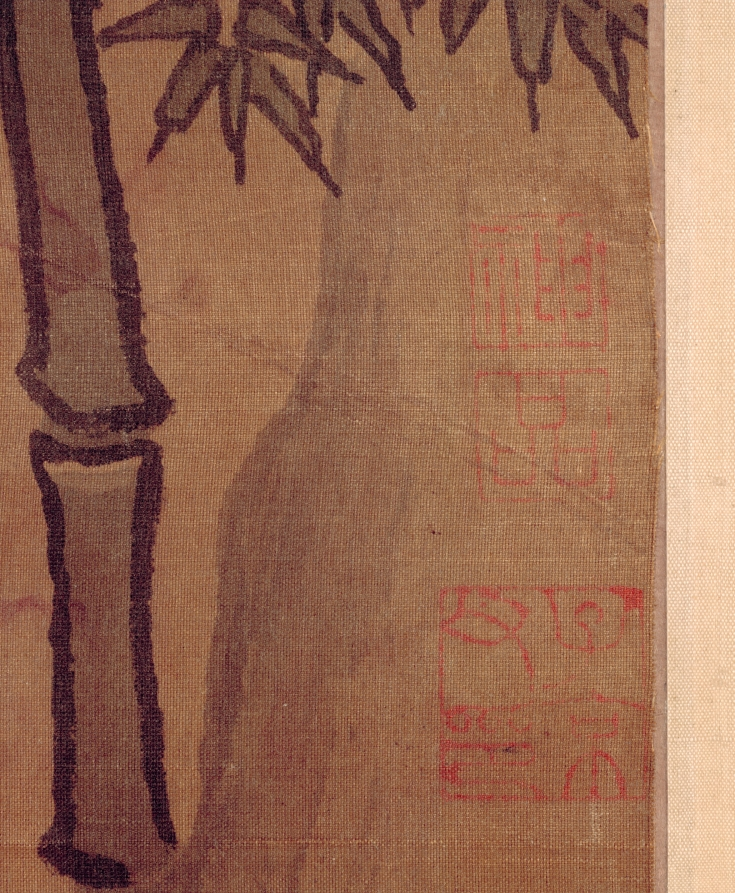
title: Bamboo and Ducks by a Rushing Stream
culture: China, Southern Song dynasty (1127–1279)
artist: Ma Yuan (Chinese, c. 1150–after 1255)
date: 1127–1279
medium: hanging scroll; ink and light color on silk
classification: Painting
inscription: 馬遠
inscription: 12 additional seals: 1 of An Kuo (1481–1534); 7 of Hsiang Yüan-pien (1525–1590); 2 of Liang Ch'ing-piao (1620–1691); 2 unidentified. (WKH)